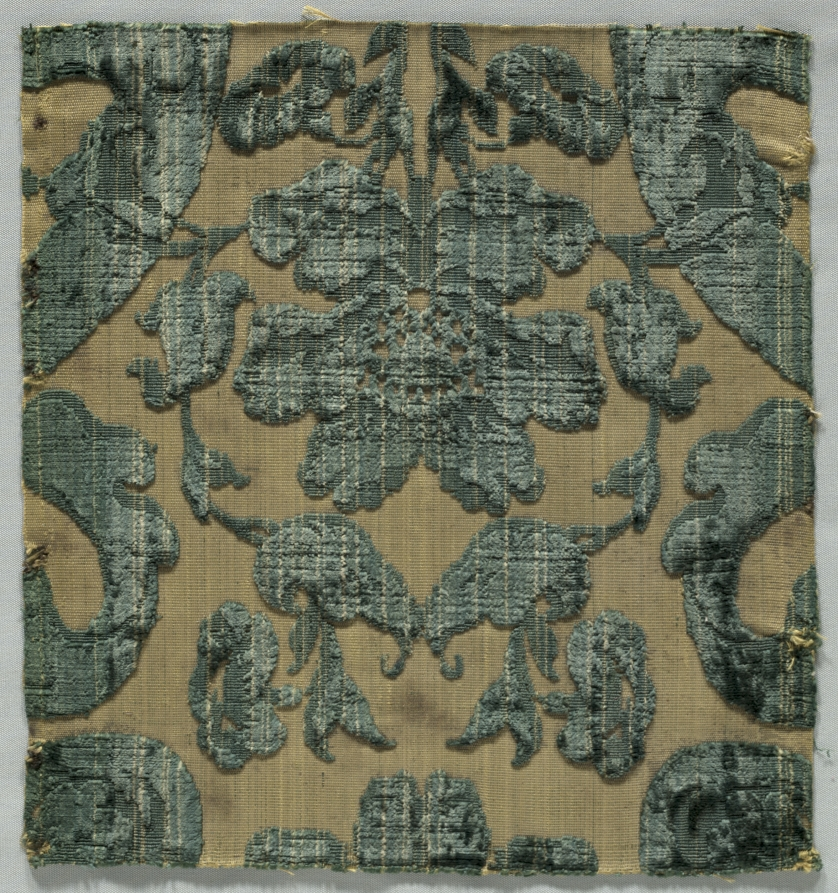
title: Velvet Fragment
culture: Italy, early 17th century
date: early 1600s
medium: velvet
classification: Velvet